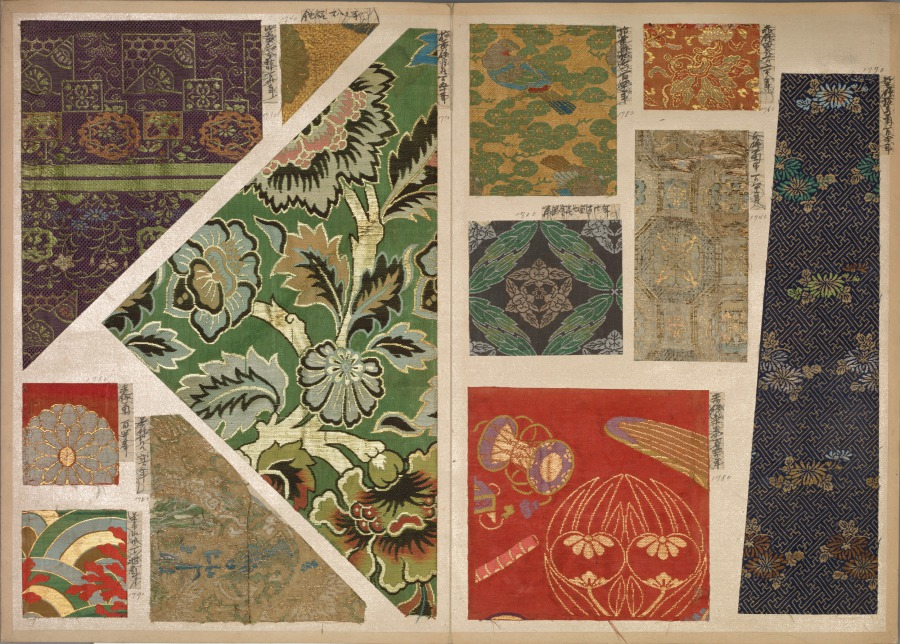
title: Album of Textile Samples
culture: Japan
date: 1790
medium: silk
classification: Textile